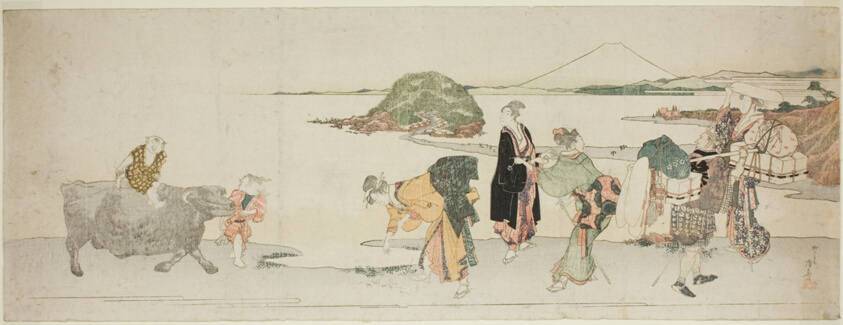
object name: Print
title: At the Beach of Shichirigahama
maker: Ryuryukyo Shinsai (Japanese, c. 1764-1820)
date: 1805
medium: Color woodblock print; long surimono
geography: Japan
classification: woodblock print; print; asian art